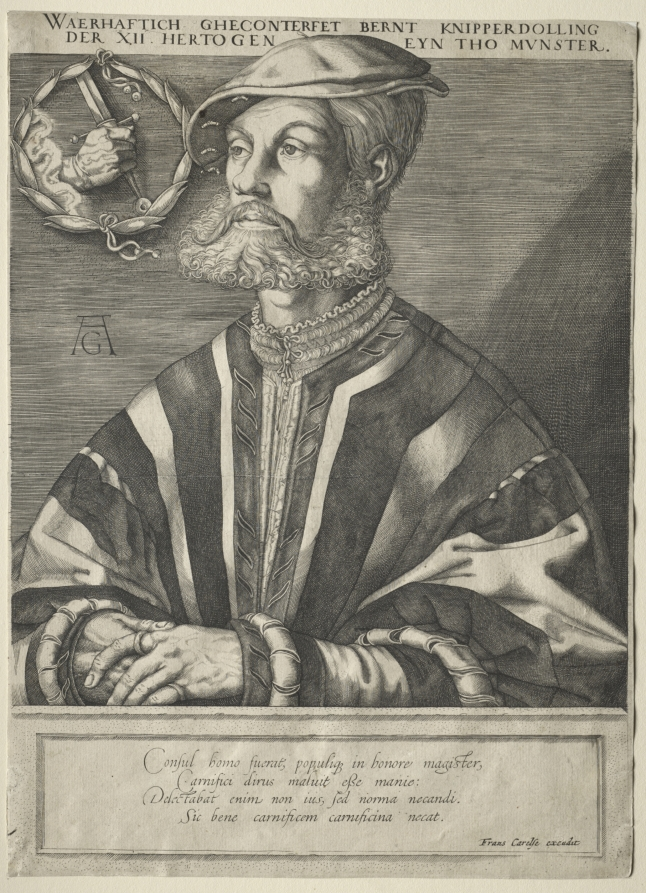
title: Portrait of Bernard Knipperdolling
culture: Netherlands, 16th century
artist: Jan Muller (Dutch, 1571-1628)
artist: after Heinrich Aldegrever (German, 1502–1555/61)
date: c. 1615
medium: engraving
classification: Print